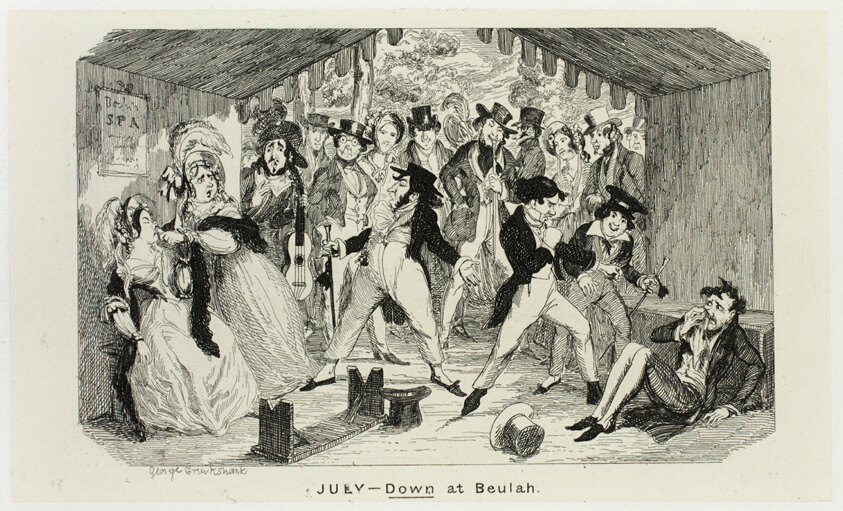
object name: Print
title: July - Down at Beulah from George Cruikshank's Steel Etchings to The Comic Almanacks: 1835-1853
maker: George Cruikshank (English, 1792-1878); published by Pickering & Chatto (English, 19th century)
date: 1840, printed c. 1880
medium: Steel etching in black on cream India paper, laid down on off-white card (chine collé)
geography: England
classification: etching; paper; steel; print; prints and drawing